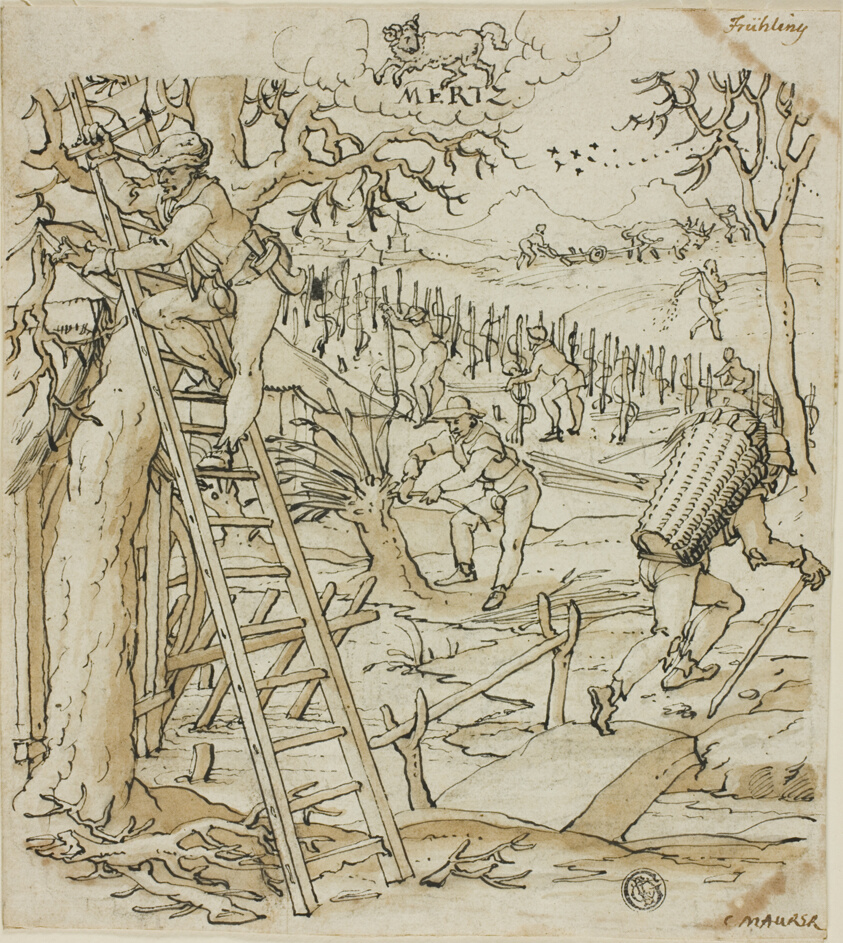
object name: Drawing and Watercolor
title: Spring (March)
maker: Christoph Maurer (Swiss, 1558-1614)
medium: Pen and black ink, with brush and brown wash, over traces of graphite on ivory laid paper, laid down on ivory laid paper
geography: Switzerland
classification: pen and ink drawings; drawings (visual works); prints and drawing